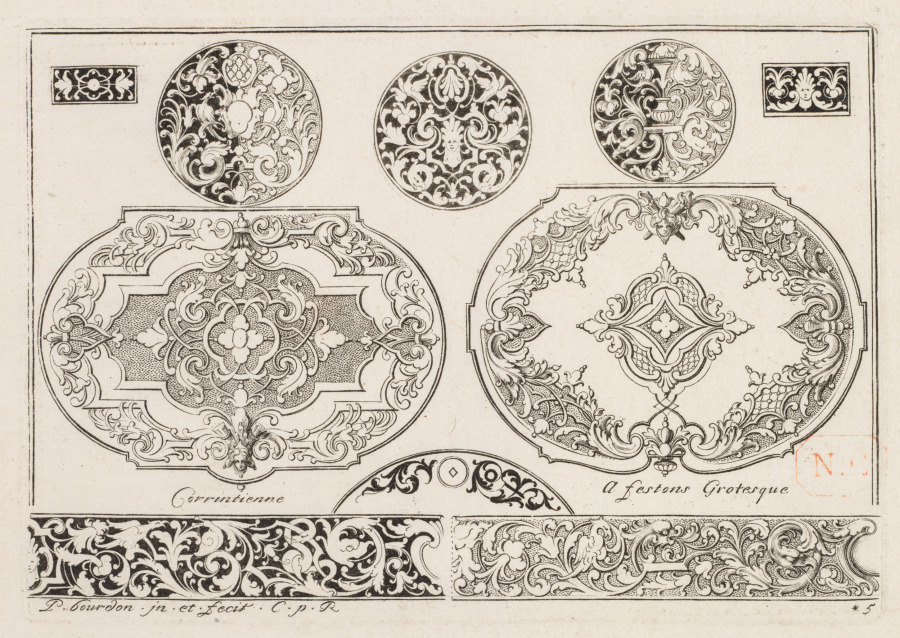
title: # 4 From " Livre sencond essais de gravjre " second book of Engraved designs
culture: France, 18th century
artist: Pierre Bourdon (French)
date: c. 1703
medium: etching and engraving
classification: Print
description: This etching is from a set of prints showcasing decorative patterns by Bourdon. The title page for the set explains that the designs are “useful for clockmakers, goldsmiths, chiselers, engravers and other people.” These craftsmen who made ornamented objects sometimes consulted printed designs for inspiration. However, pattern prints similar to Bourdon’s also catered to aristocrats and wealthy professionals who pursued knowledge about artists and current styles.